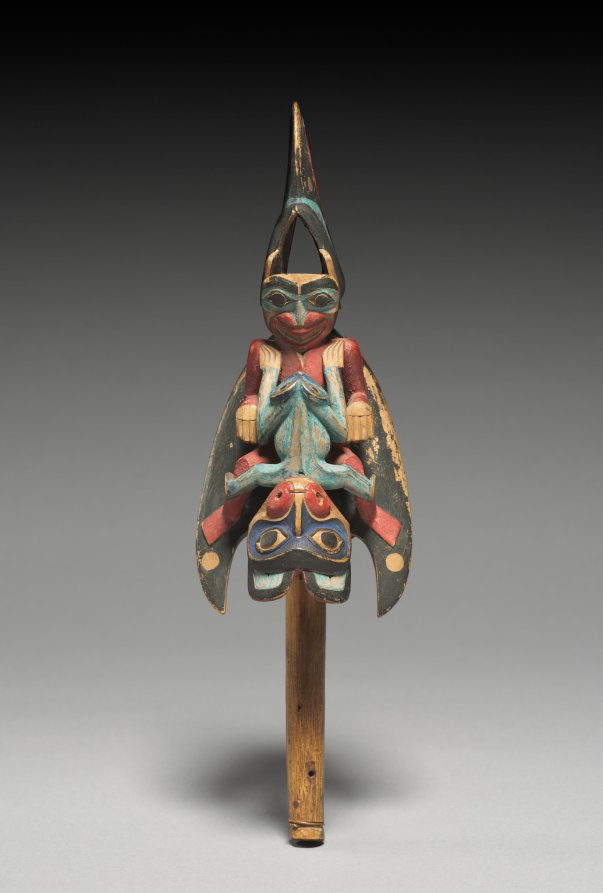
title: Raven Rattle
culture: Native North America, Northwest Coast, British Columbia and Alaska, Haida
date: late 1800s–early 1900s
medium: wood, pigment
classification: Wood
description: Rattles featuring ravens with figures on their backs may depict the acts of shamans, whose exceptional abilities allow them to interact with other-than-human beings to control weather, heal illness, or locate animals for the hunt. Such rattles may have started with shamans but secular chiefs often use them during winter ceremonies, implying they are symbols of power.